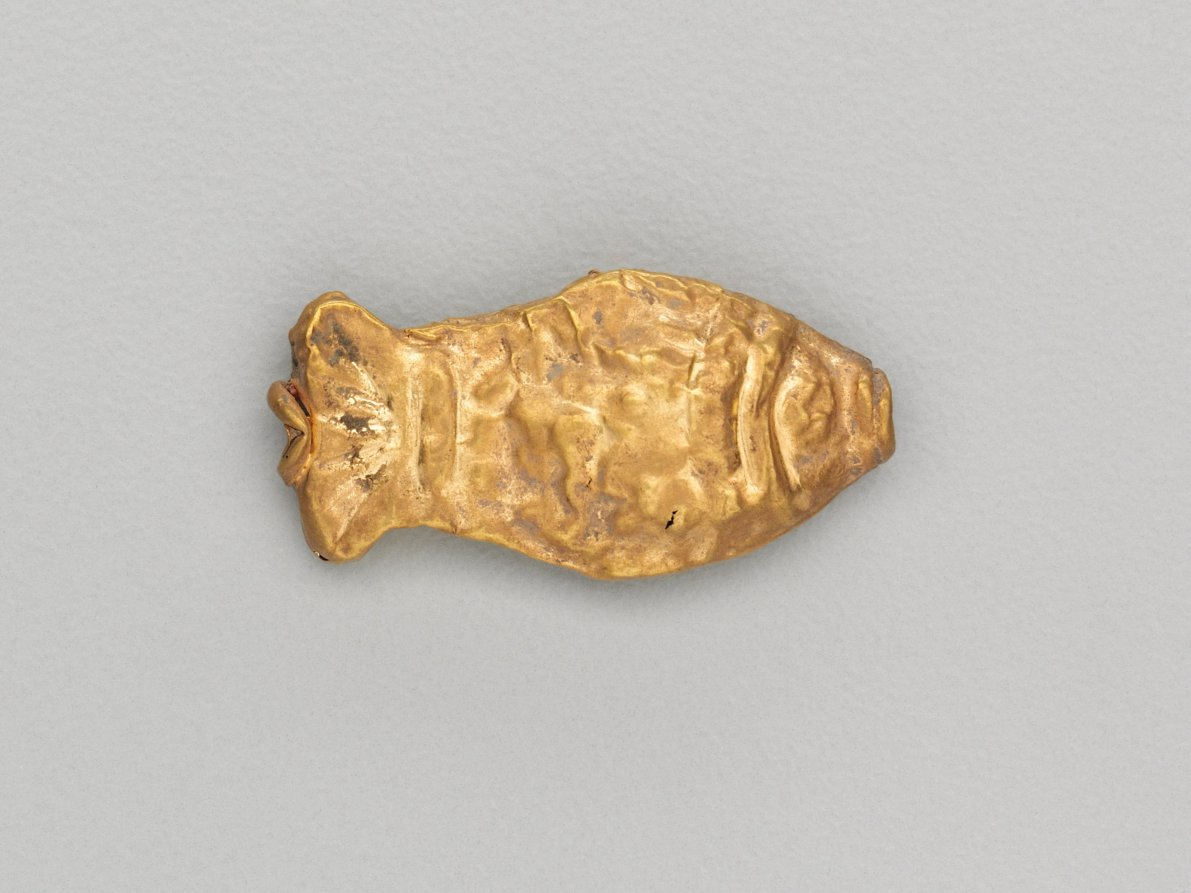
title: Necklace Bead in the Form of a Fish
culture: India, Shunga period (185–78 BCE)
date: 185–72 BCE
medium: gold repoussé with granulation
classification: Jewelry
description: Jewelry in ancient India often consisted of elements associated with water, such as fish and other aquatic plants and animals. Since water is essential for life, imagery that connotes water is life-affirming, or auspicious, and therefore appropriate adornment.